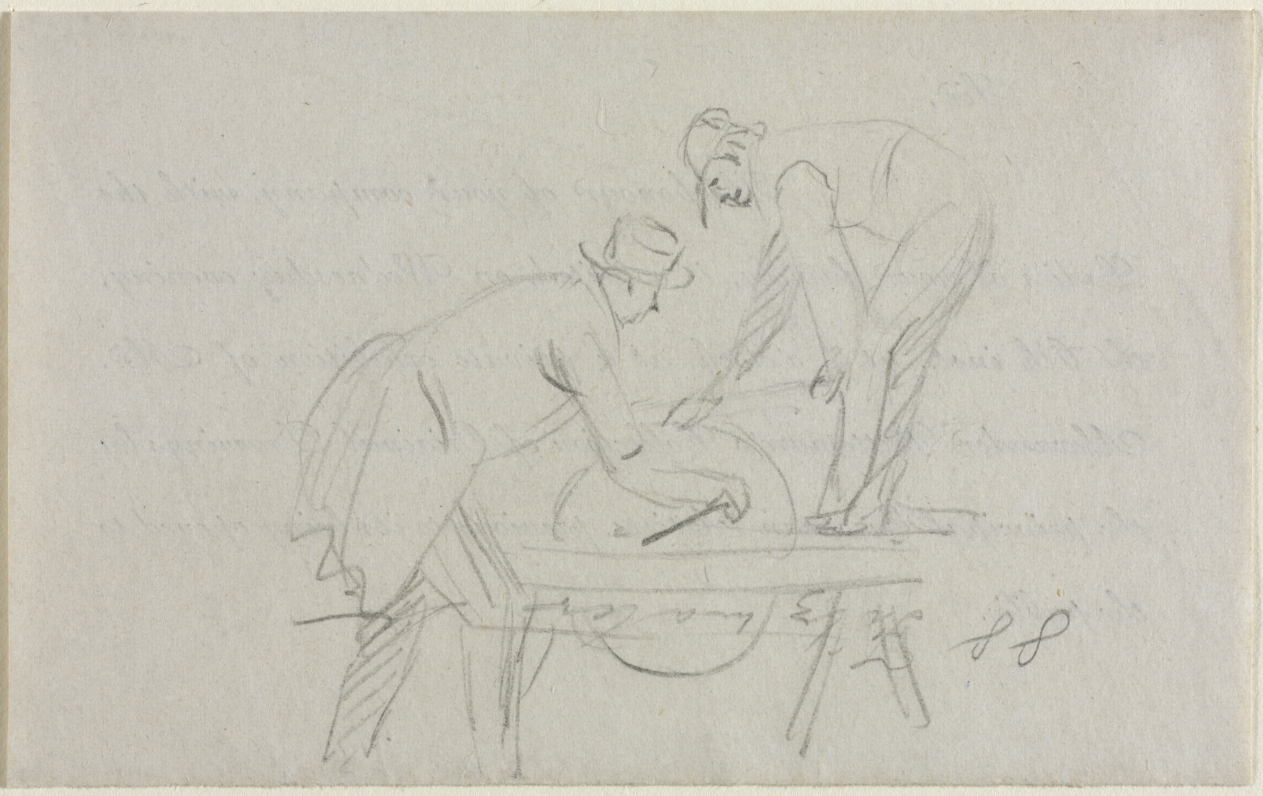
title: Grinding the Axe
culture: America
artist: William Sidney Mount (American, 1807–1868)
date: c. 1827–68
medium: graphite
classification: Drawing